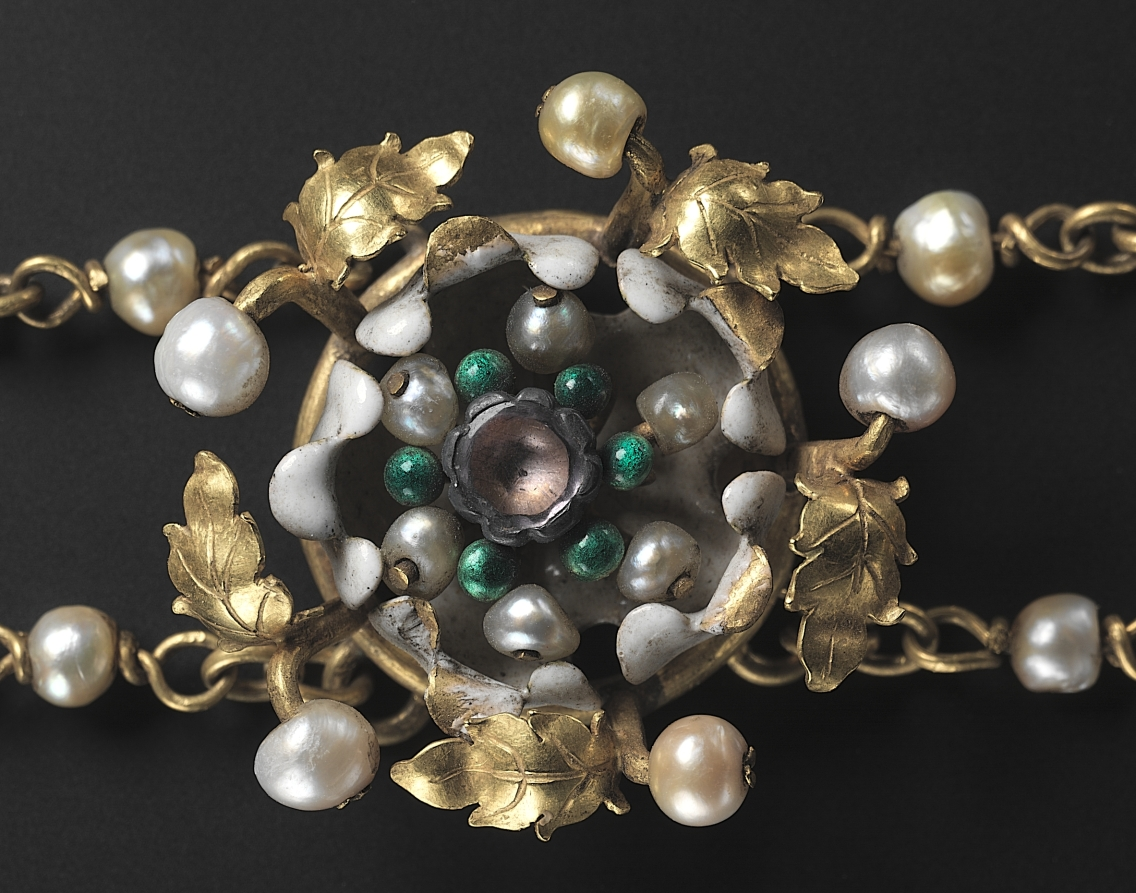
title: Twelve Medallions Mounted as a Necklace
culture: France, Paris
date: c. 1400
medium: enameled gold, precious stones, and pearls; some later additions with modern chain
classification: Jewelry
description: These medallions, which have loops on the backs, must have originally been sewn onto a garment or, more likely, a woman’s headpiece. In spite of the modern chain to which they are now attached, the medallions are unique items of feminine apparel from around 1400. Such items would have been well known at the courts of the Valois in Paris, Bourges, and Dijon. The central medallion with a “white lady” is enameled “in the round”––a new Parisian technique for enameling irregular or three-dimensional surfaces. Such white lady medallions are described in inventories of the period